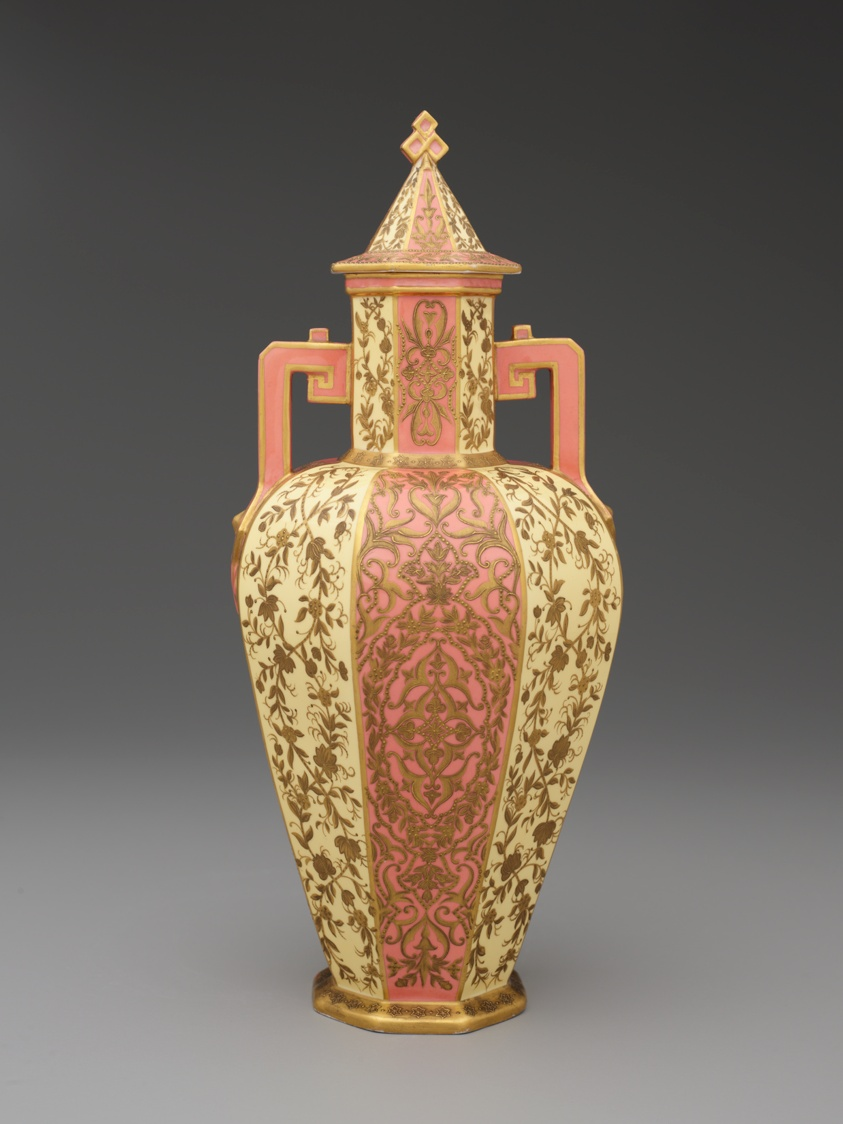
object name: Ceramics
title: Covered Vase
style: Aestheticism, 19th century, Aesthetic Movement, english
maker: Crown Derby (England, founded 1750)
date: 1884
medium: Bone china, enamel, and gilding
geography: England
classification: ceramics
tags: vase